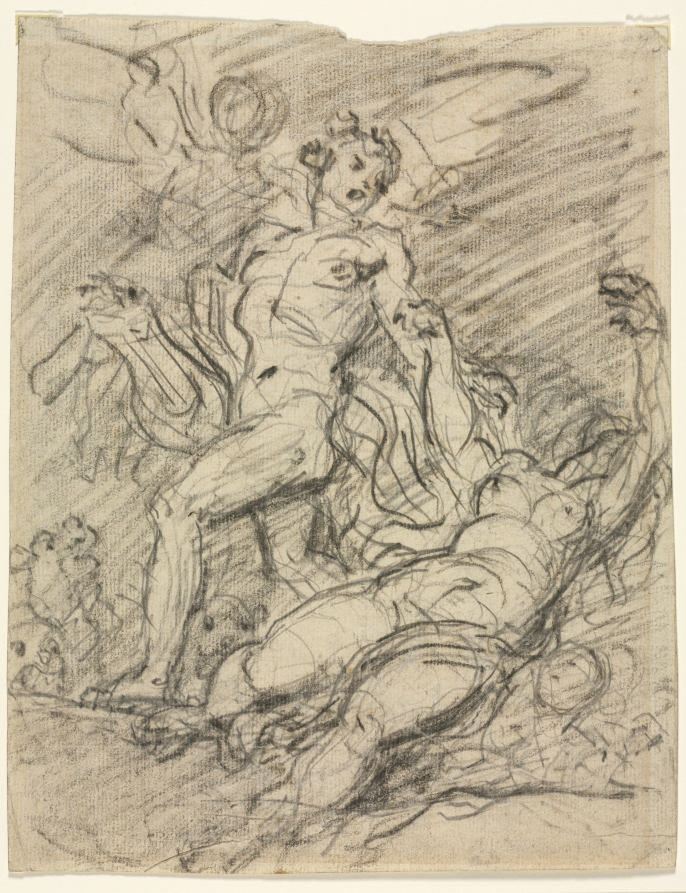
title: Orpheus and Eurydice (recto)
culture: France, 18th century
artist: Jean-Honoré Fragonard (French, 1732–1806)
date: c. 1761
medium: black chalk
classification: Drawing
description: Quick drawings could serve a variety of purposes, and it is not always clear today why an artist created a particular sketch. This one may record a painting Fragonard saw during a journey to Italy, or capture an idea he was considering for a painting of his own. Orpheus, identified by the lute, grasps for his love Eurydice as she is pulled down into Hades. The snarling animals near his feet may represent Cerberus, the multiheaded guard dog of the underworld.